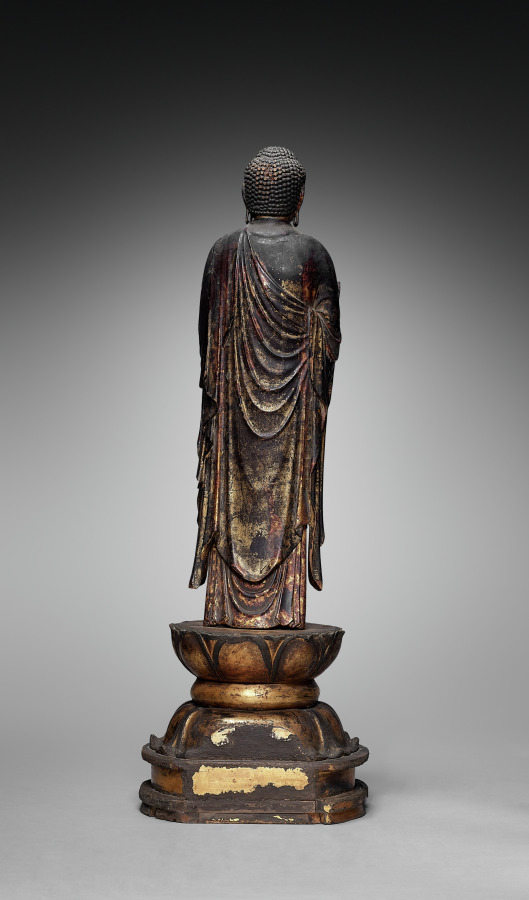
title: Amida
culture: Japan, Kamakura period (1185–1333)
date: 1200s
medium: Wood with lacquer and gilding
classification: Sculpture